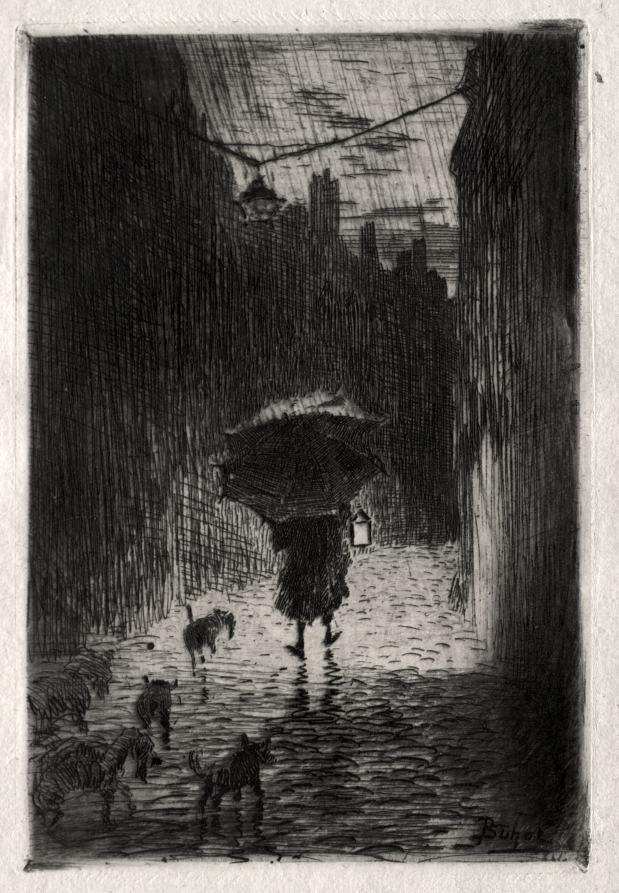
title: Rain and Umbrella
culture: France, 19th century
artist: Félix Hilaire Buhot (French, 1847–1898)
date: c. 1875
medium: etching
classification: Print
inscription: signed, lower left, in plate: "Buhot"